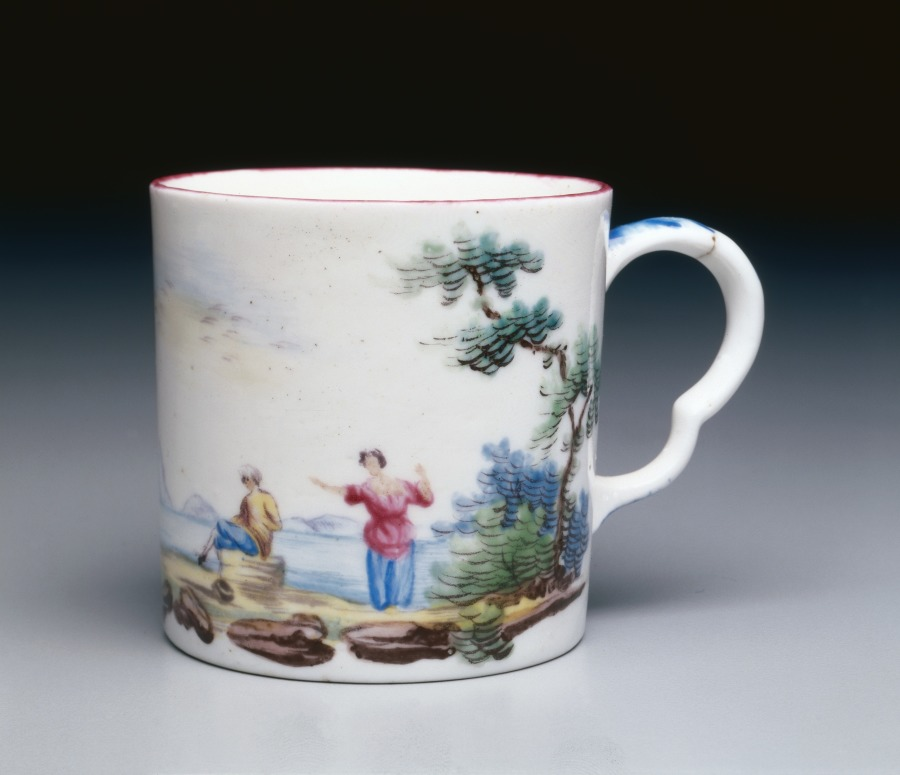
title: Cup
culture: France, 18th century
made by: Sceaux Factory (French, active 1748–66)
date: c. 1775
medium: soft-paste porcelain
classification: Ceramic